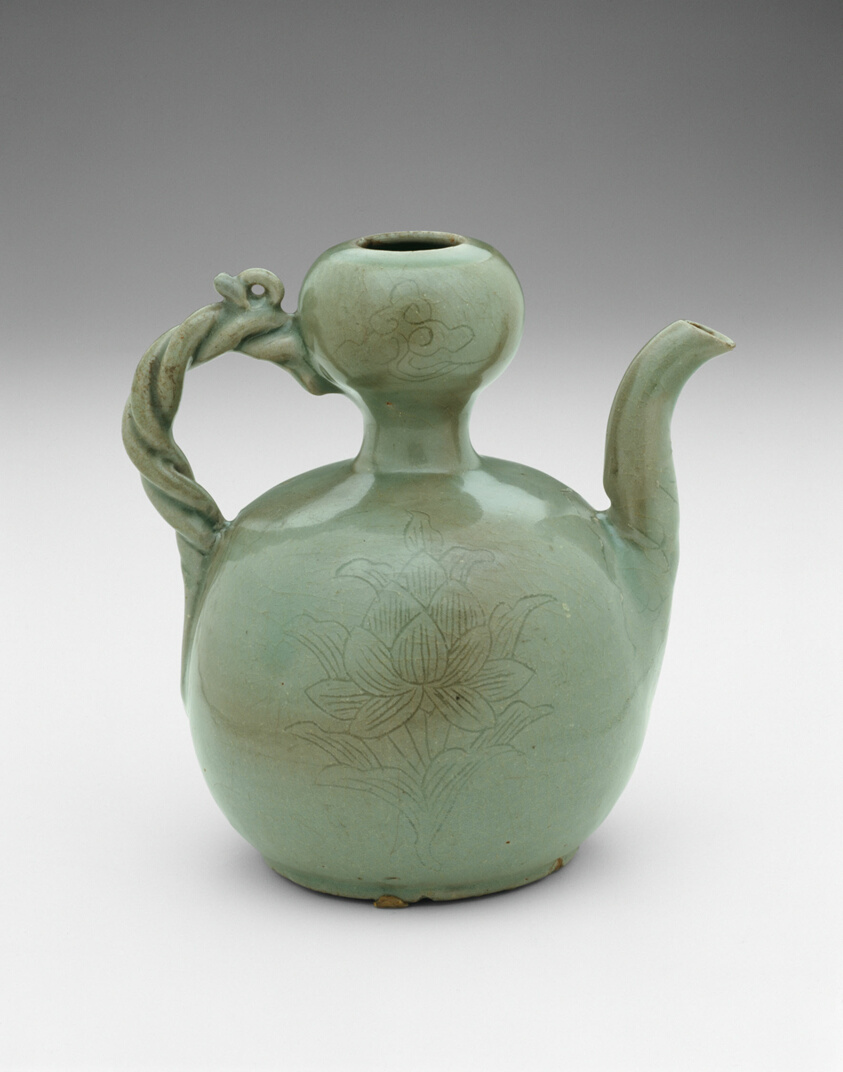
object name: Vessel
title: Gourd-Shaped Ewer with Twisted Rope Handle with Lotus Motifs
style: Korean (culture or style)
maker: Korea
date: Goryeo dynasty (918–1392), 12th-13th century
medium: Stoneware with celadon glaze and underglaze carved decoration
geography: Korea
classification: ewer (vessel); stoneware; vessel; asian art; ceramics